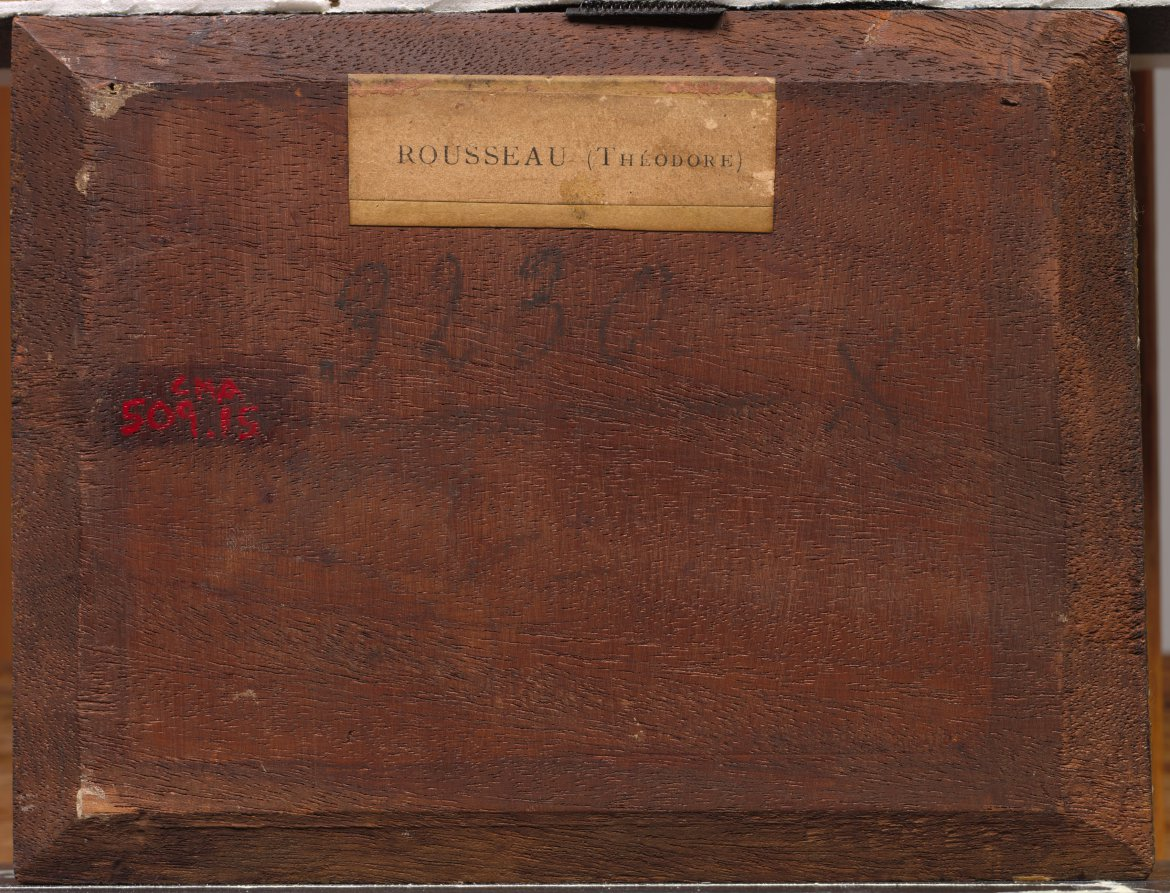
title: Cottages Near Larchant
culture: France, 19th century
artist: imitator of Théodore Rousseau (French, 1812–1867)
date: not dated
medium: oil on wood panel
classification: Painting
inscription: Signed lower left: TH. Rousseau